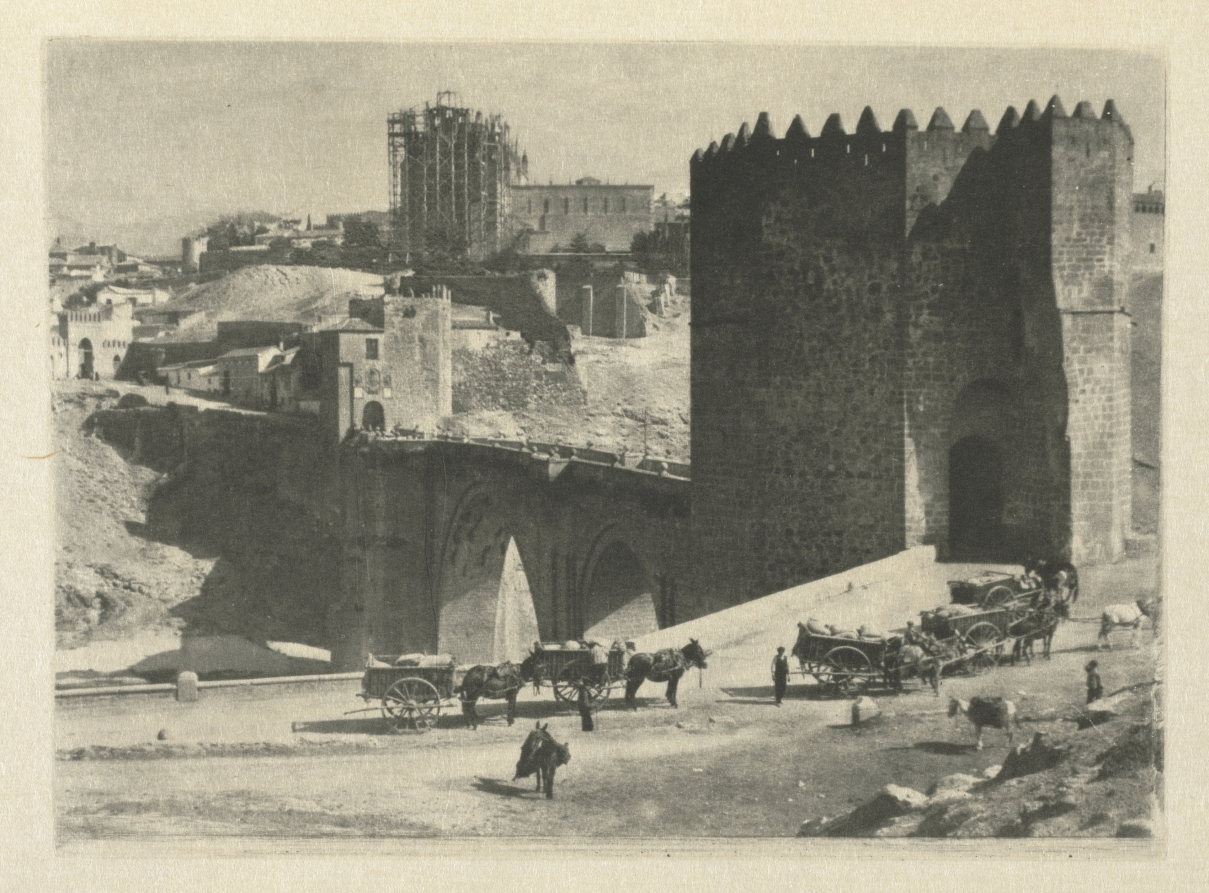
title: Camera Work: Bridge of St. Martin - Toledo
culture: England, 20th century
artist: J. Craig Annan (British, 1864–1946)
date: 1914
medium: photogravure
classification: Bound Volume